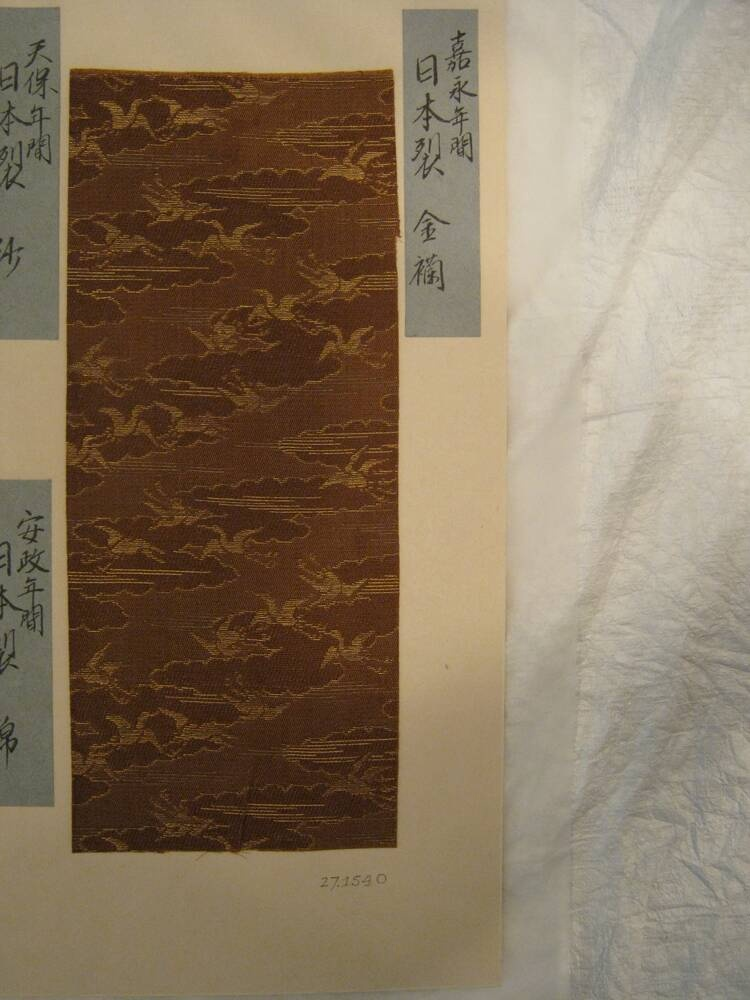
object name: Textile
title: Fragment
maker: Japan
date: 18th/19th century, Edo period (1615–1868)/ Meiji period (1868–1912)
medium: Fancy compound twill, silk and & gilt paper; 3 1/2 strips to m.m.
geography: Japan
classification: textile; weaving